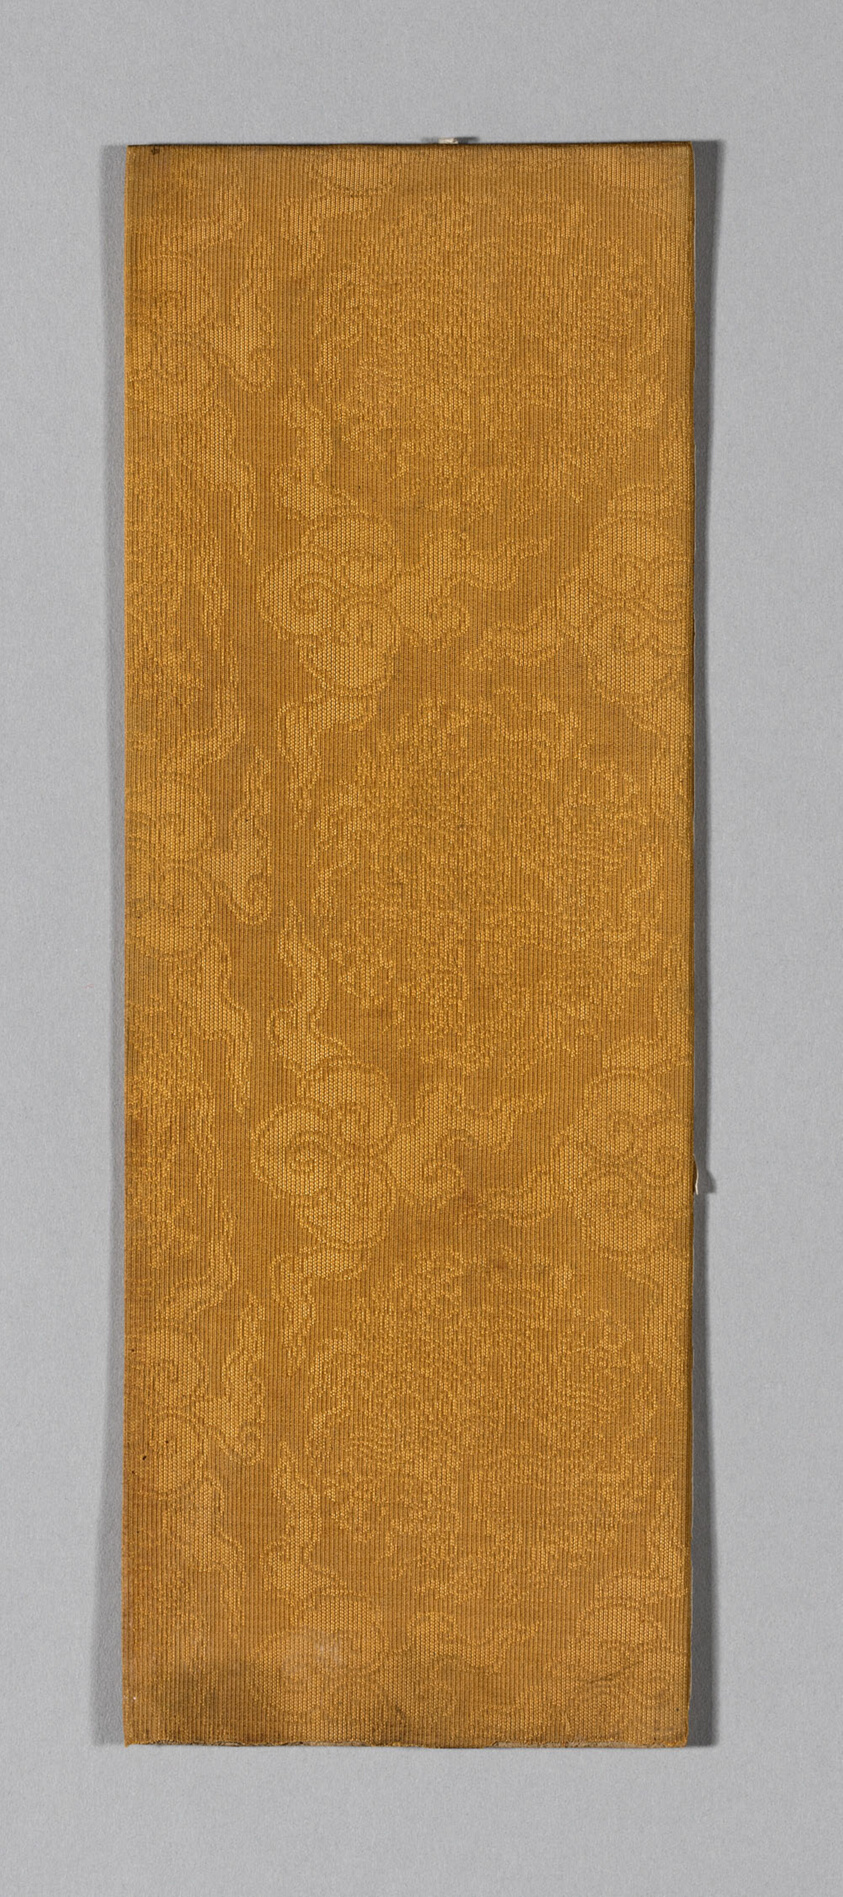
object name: Textile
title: Sutra Cover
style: ming, Chinese (culture or style), East Asian, asian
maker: China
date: Ming dynasty (1368–1644), c. 1590's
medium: Silk, gauze weave with supplementary patterning wefts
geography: China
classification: textile; weaving